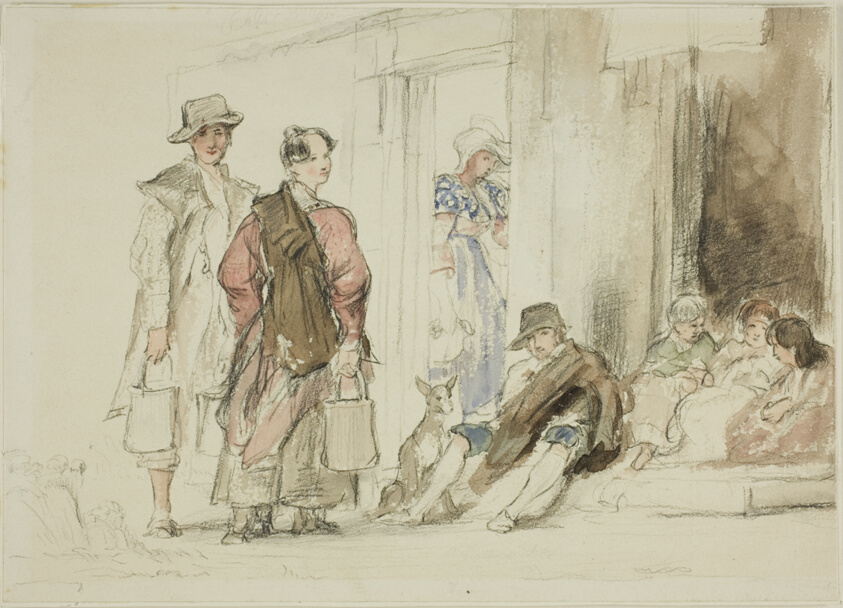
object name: Drawing and Watercolor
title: Figures near Doorway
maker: Sir David Wilkie; Scottish, 1785–1841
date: 1825/30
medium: Watercolor over black chalk, with touches of graphite, on ivory wove paper, laid down on card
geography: Scotland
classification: watercolor; drawings (visual works); prints and drawing